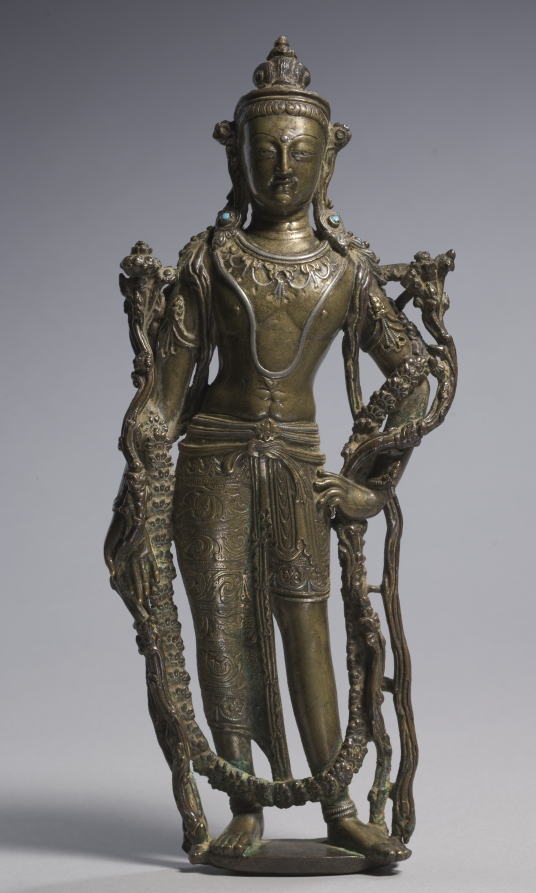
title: Bodhisattva Padmapani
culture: Western Tibet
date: 900s–1000s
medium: brass inlaid with silver and gold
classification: Sculpture